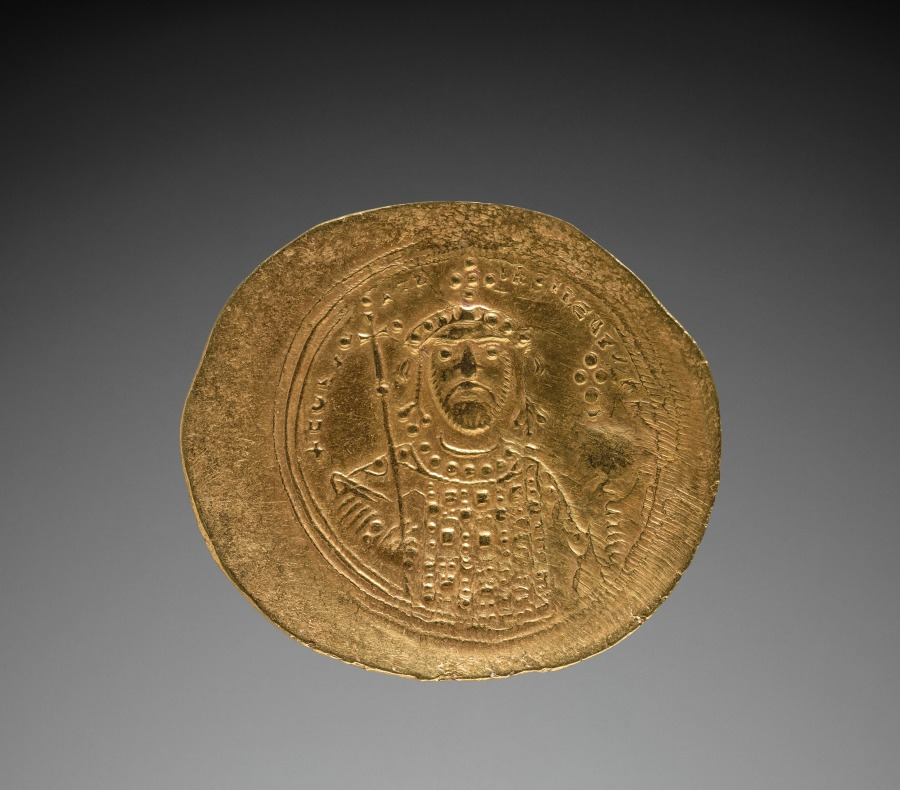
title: Nomisma with Constantine IX Monomachus (reverse)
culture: Byzantium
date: 1042–1055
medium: gold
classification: Coins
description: The vast number of surviving Byzantine coins attests to the level of trade across the empire. Controlled and supervised by the emperor, the producers of coins took care to represent his authority and reflect his stature. Talented artists were recruited to engrave the dies (molds) used for the striking of coins. Emperors increasingly came to include their heirs and co-emperors on their coinage, as well as other family members or even earlier rulers. Coins were recognized, then as now, as small, portable works of art. With their inscriptions and images, Byzantine coins provide valuable documentation of historical events and a record of the physical appearance of the emperors. The solidus is the basic gold coin of 24 karats; the tremissis, a gold coin of one-third the weight and value of the solidus; and the nomisma, which in the 10th century replaced the solidus as the standard gold coin.